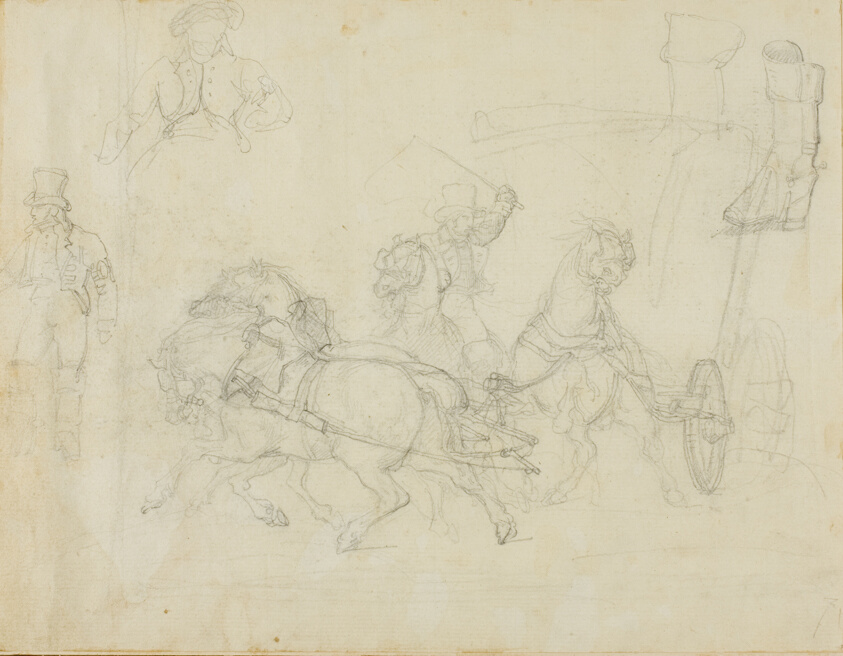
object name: Drawing and Watercolor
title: Stagecoach Drawn by Five Horses and Other Sketches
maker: Jean Louis André Théodore Géricault (French, 1791-1824)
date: 1818/1819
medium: Graphite, on cream laid paper, perimeter mounted on cream wove paper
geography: France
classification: graphite; drawings (visual works); prints and drawing